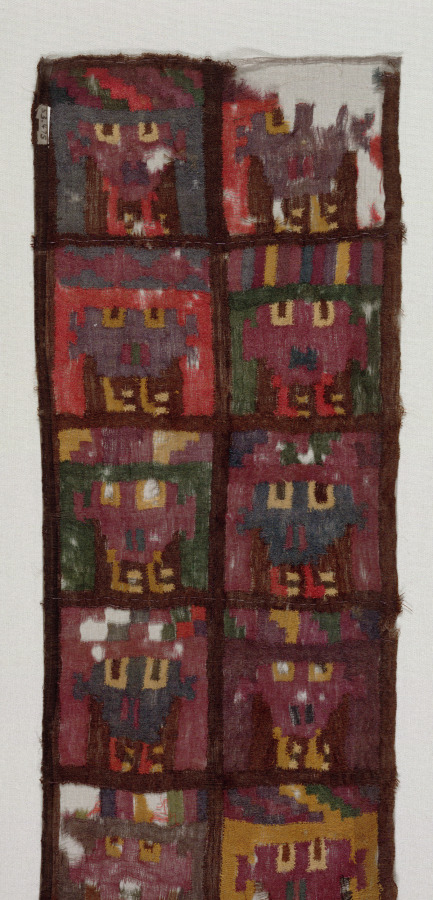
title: Band with Trophy Heads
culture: Peru, South Coast, Nasca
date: 100 BCE–700 CE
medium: interlocking warp and weft, single interlock: wool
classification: Textile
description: This band, remarkable for its intense color and spider-web sheerness, was created using an unusual technique known as discontinuous warp and weft. That is, none of the vertical or horizontal yarns are continuous from one side of the band to the other. Rather, they travel back and forth within their own color areas, linking at the edges with yarns in adjacent areas. This is a difficult feat when weaving on a loom and the creator likely used another approach, such as darning with a needle over a ground cloth that was then removed. The image repeated in each of the band’s rectangles is a head supported on two little feet.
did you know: This band is made in with a weaving technique that is unique to the ancient Andes.